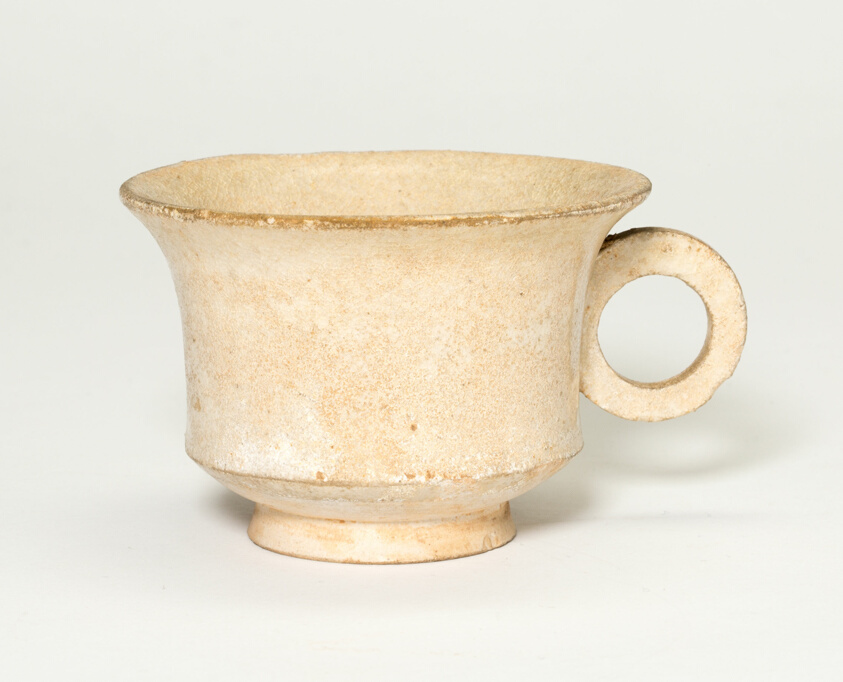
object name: Vessel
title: Handled Cup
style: Chinese (culture or style)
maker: China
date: Tang dynasty (618–907)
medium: Slip-coated and glazed stoneware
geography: China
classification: drinking vessel; ceramics; asian art; vessel